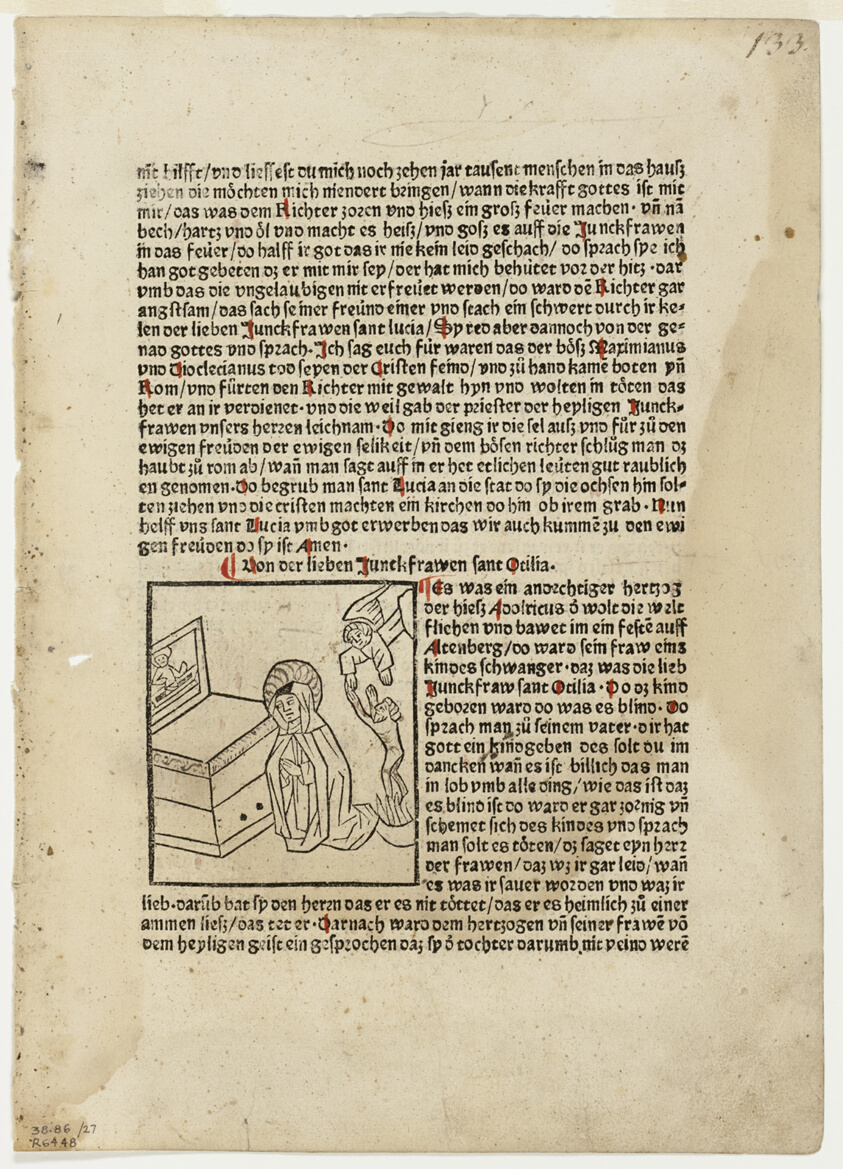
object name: Print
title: Saint Otilia from Plenarium, Plate 27 from Woodcuts from Books of the 15th Century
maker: Unknown Artist (Strassburg, late 15th century); printed and published by Martin Schott (German, active 1481–1499); portfolio text by Wilhelm Ludwig Schreiber (German, 1855–1932)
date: c. 1483, portfolio assembled 1929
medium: Woodcut in black with pen and gray ink additions, and letterpress in black with rubrication (recto and verso), on cream laid paper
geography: Germany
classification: woodcut; print; prints and drawing